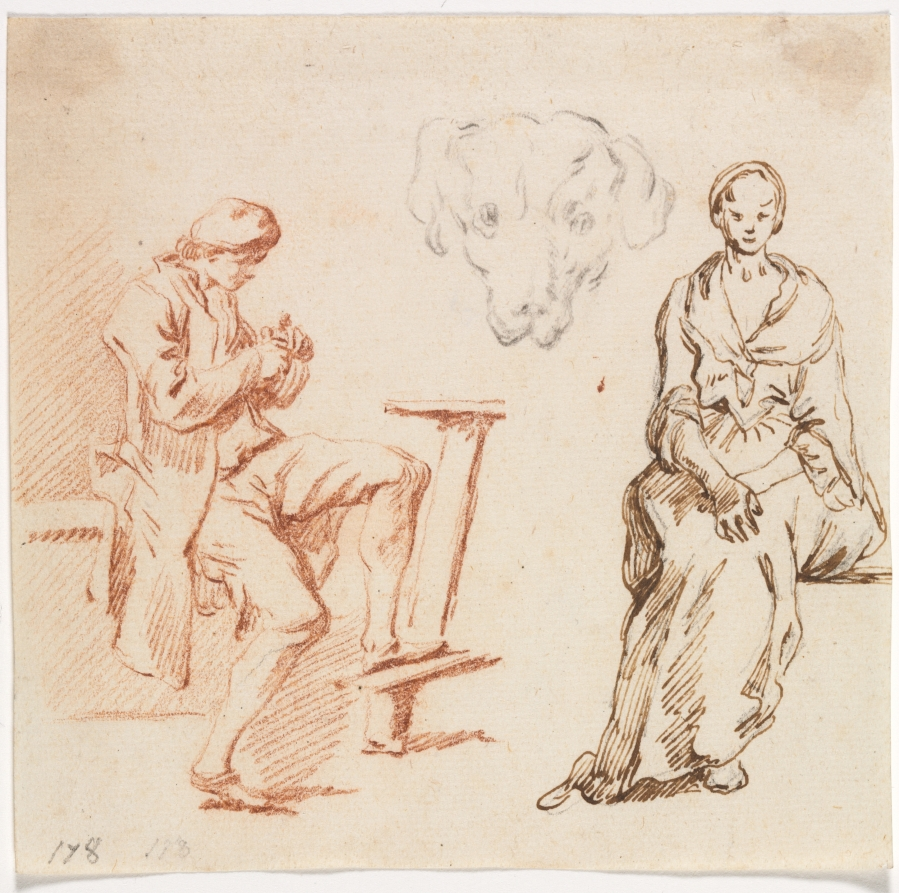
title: Sheet of Studies: Seated Man, Head of a Dog, Seated Woman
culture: France, 18th century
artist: Claude-Joseph Vernet (French, 1714–1789)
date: 1700s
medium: red chalk (seated man); black chalk (head of a dog); pen and brown ink over black chalk (seated woman)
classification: Drawing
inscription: lower left, in graphite: 178 ; lower left, in graphite: 113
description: At age 20, Claude-Joseph Vernet traveled to Italy, where he remained for two decades, painting landscape views of the Roman countryside and stormy, imaginary seascapes for Italian aristocrats and wealthy French and British tourists. Vernet populated his paintings with contemporary figures based on sketches from life, such as the three shown here. Drawn at different times in different media, together they form an amusing glimpse of Italian street life in the 1700s.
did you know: Claude-Joseph Vernet was first trained as an artist by his father, who was an artisan specializing in carriage decorations.